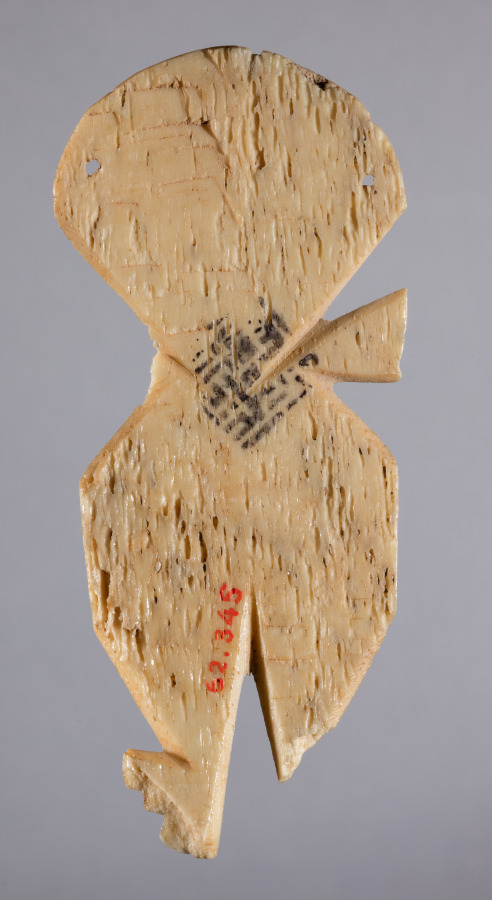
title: Figurine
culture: Iran, early Islamic period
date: 700s - 900s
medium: bone, incised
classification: Miscellaneous